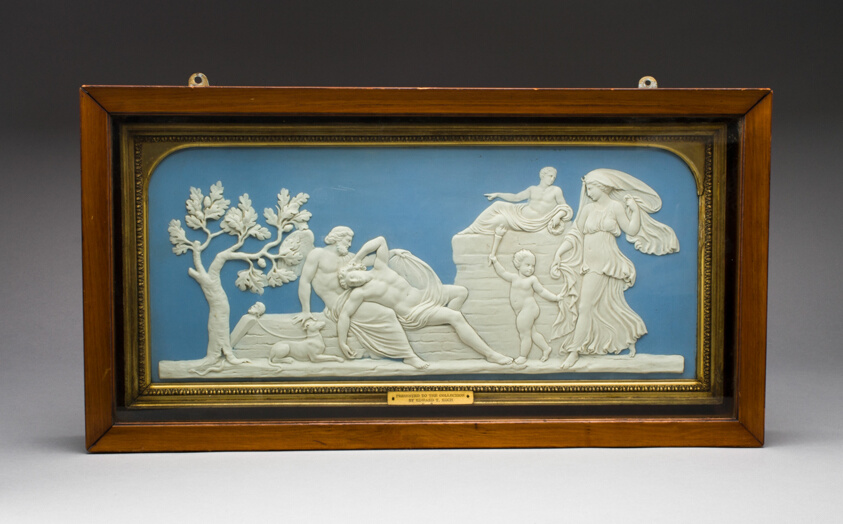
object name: Ceramics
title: Plaque with Selene and Endymion in Shadow Box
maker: Wedgwood Manufactory (England, founded 1759)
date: Late 18th/19th century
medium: Stoneware (jasperware) in partly gilded wood frame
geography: Burslem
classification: sculpture; stoneware; european decorative arts; ceramics